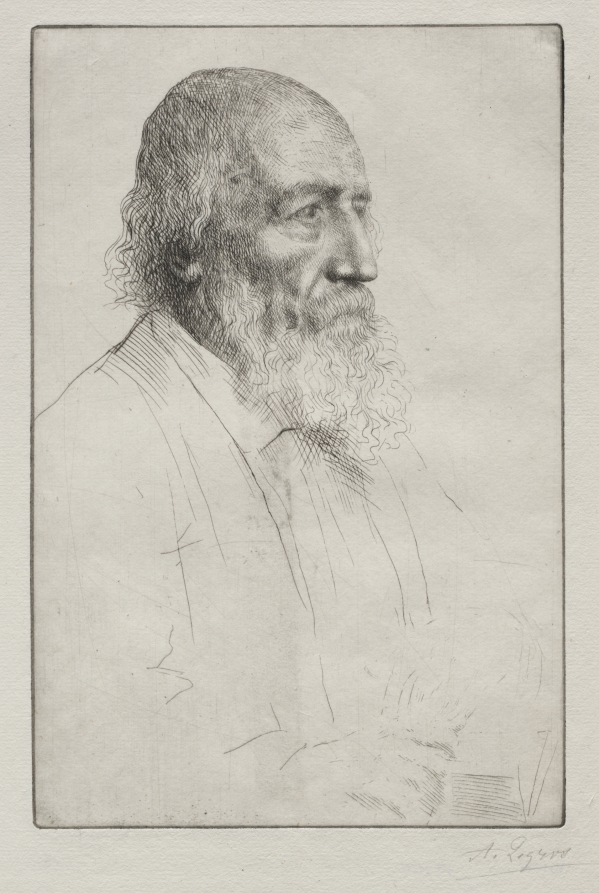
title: Alfred Lord Tennyson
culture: France, 19th century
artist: Alphonse Legros (French, 1837–1911)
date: c. 1857–1911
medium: drypoint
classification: Print